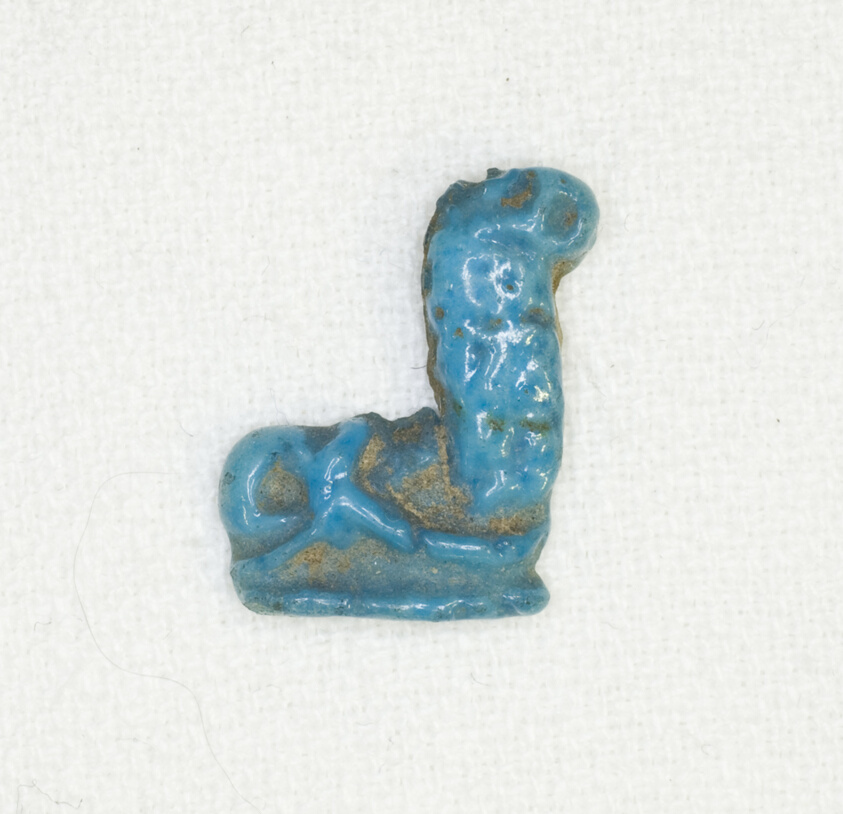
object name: Costume and Accessories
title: Amulet or Inlay of a Serpent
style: egyptian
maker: Egyptian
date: Late Period (about 664–332 BCE)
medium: Faience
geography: Egypt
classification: amulet; ceramics; jewelry; ancient art; costume; faïence (composite material)